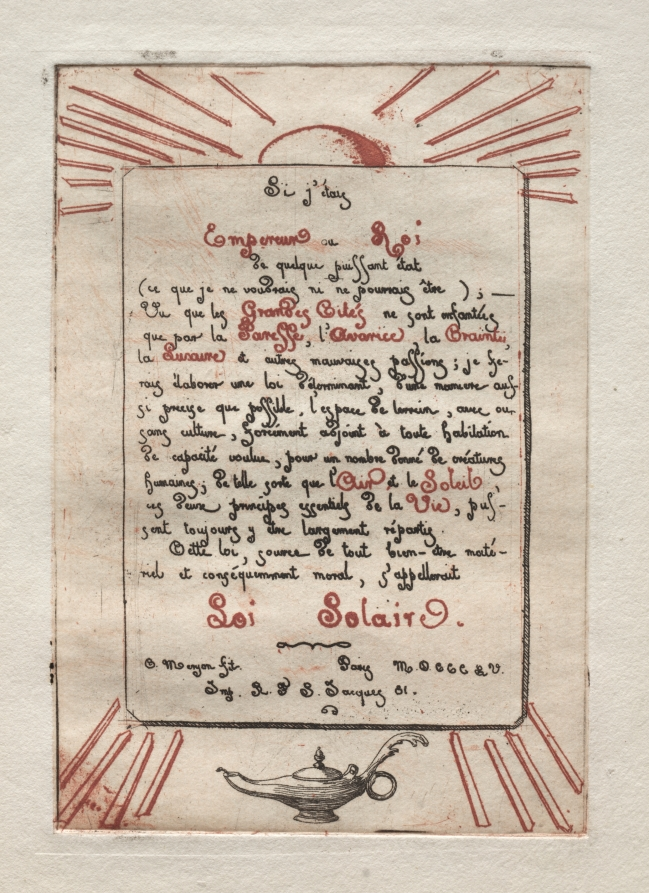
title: Solar Law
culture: France, 19th century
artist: Charles Meryon (French, 1821–1868)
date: 1855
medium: etching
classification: Print